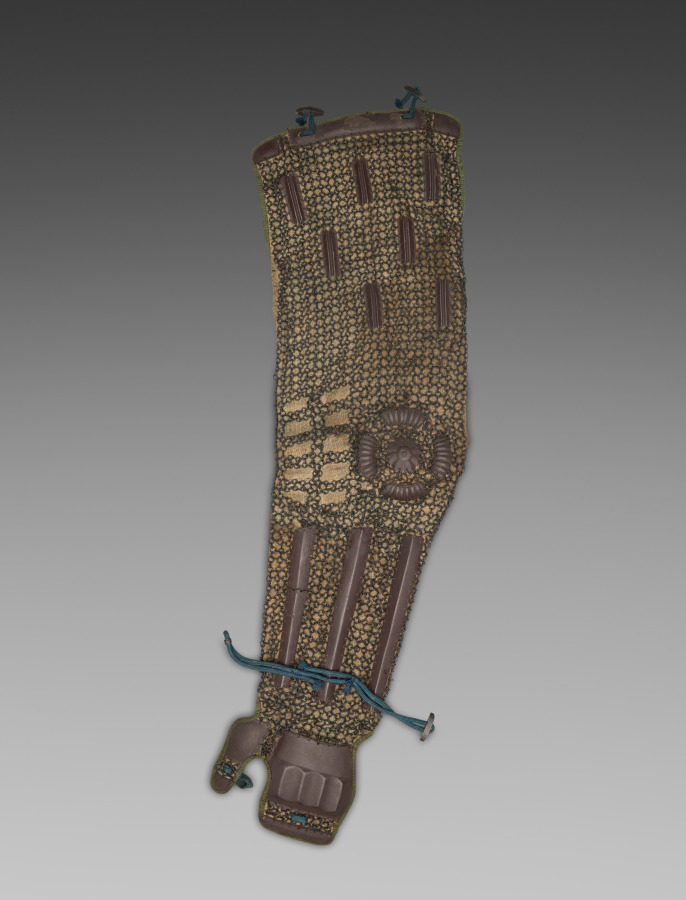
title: Armored Sleeve (Kote)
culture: Japan, Edo period (1615–1868)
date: 1615–1868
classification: Arms and Armor